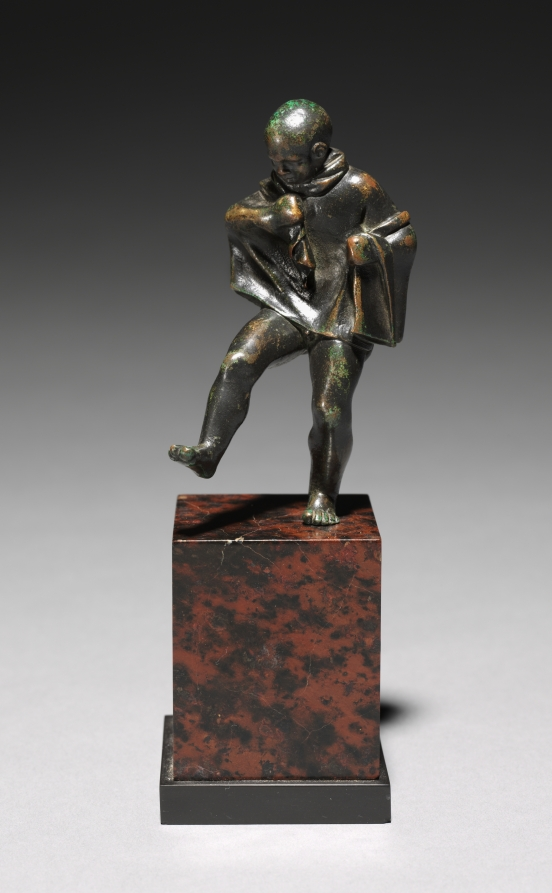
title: Dancing Boy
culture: Northern Italy, early 16th century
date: c. 1500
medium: bronze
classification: Sculpture